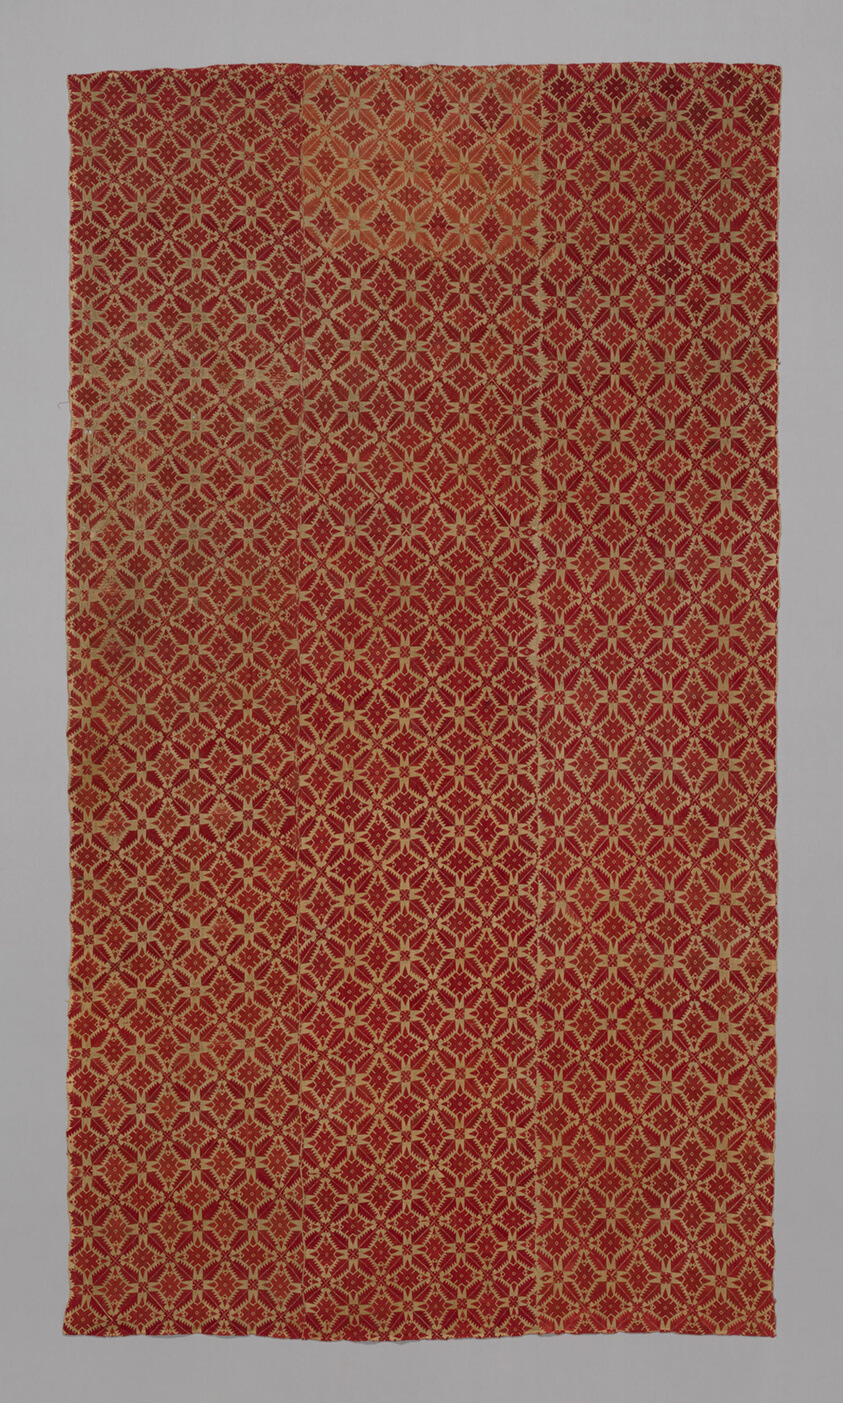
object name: Textile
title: Panel (Bed Curtain)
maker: Greece, Cyclades Islands, Naxos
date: 18th century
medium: Linen, plain weave; embroidered with silk in running stitches (pattern darning) three loom widths joined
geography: Náxos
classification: textile; needlework (visual works)